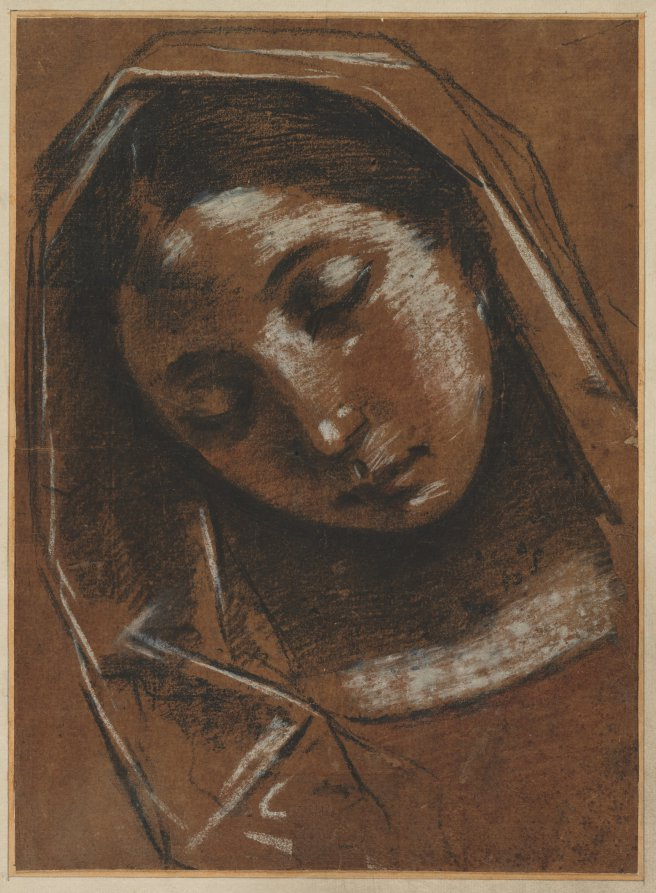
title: Head of the Virgin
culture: Italy, 17th century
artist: Giacomo Cavedone (Italian, 1577–1660)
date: c. 1614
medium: black crayon (rubbed in places) with red chalk, heightened with white crayon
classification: Drawing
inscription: VERSO OF SECONDARY SUPPORT, lower center, in graphite: Giacomo Cavedone